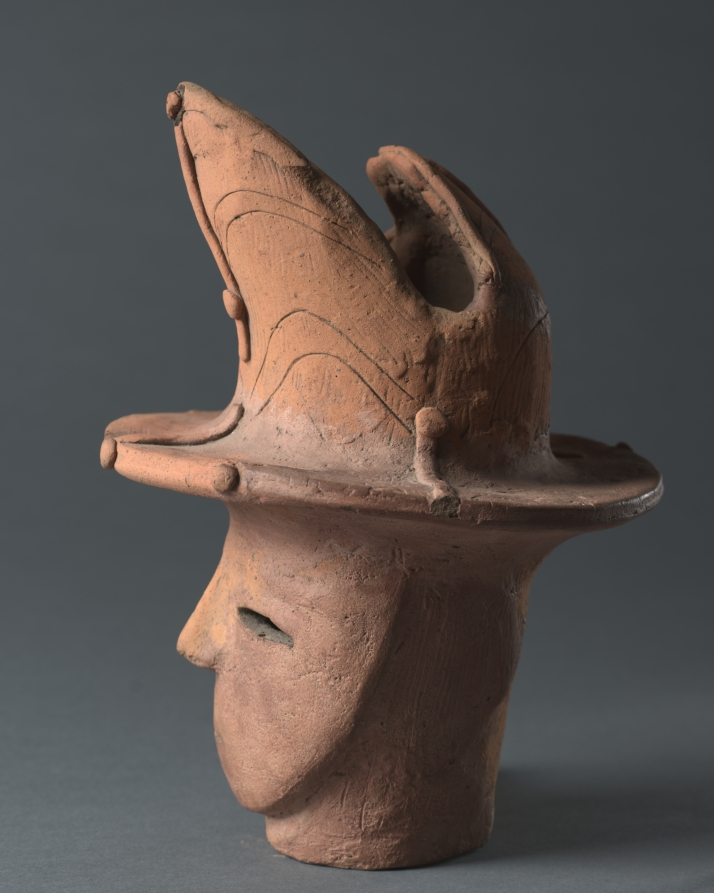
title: Male Haniwa Head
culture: Japan, Kofun period (300–710 CE)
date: c. 500–600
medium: earthenware with ochre wash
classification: Sculpture